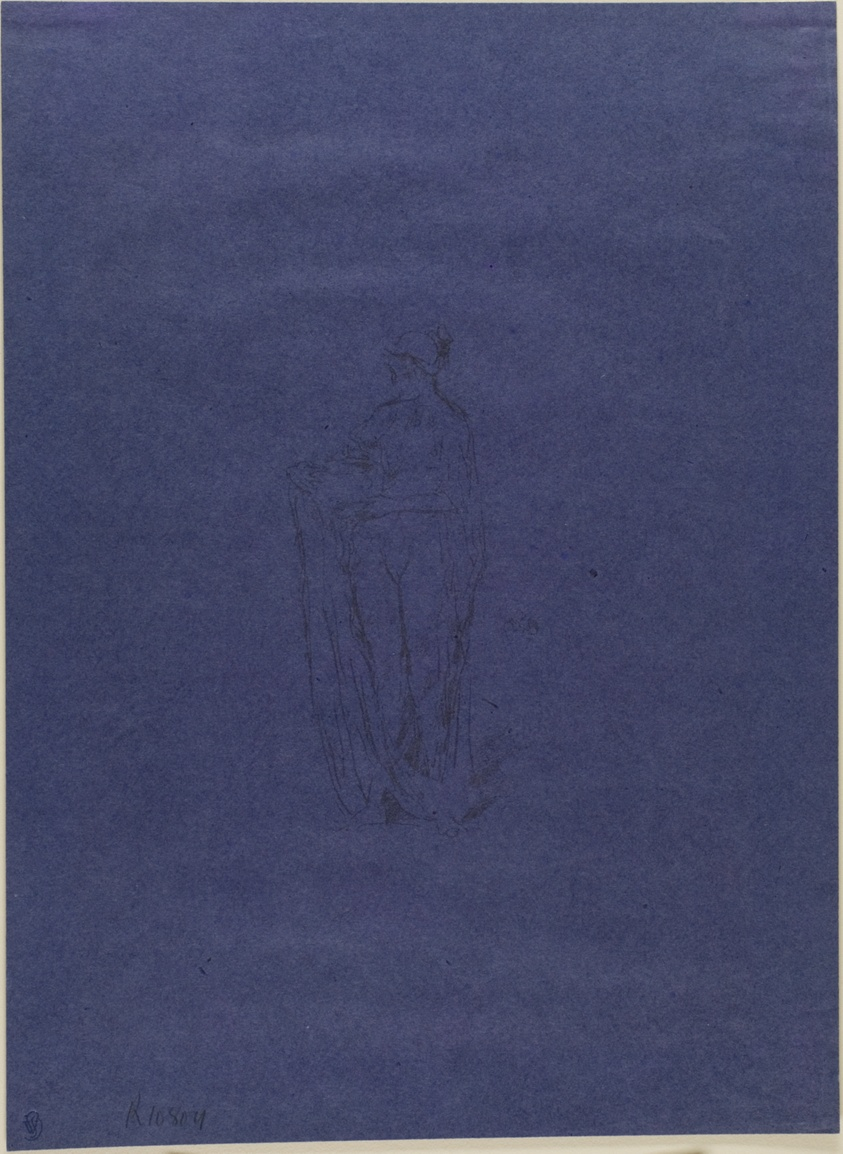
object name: Print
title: Girl with Bowl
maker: James McNeill Whistler (American, 1834-1903)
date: 1895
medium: Transfer lithograph in gray on purple wove Japanese vellum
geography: United States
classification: transfer lithograph; lithograph; print; prints and drawing